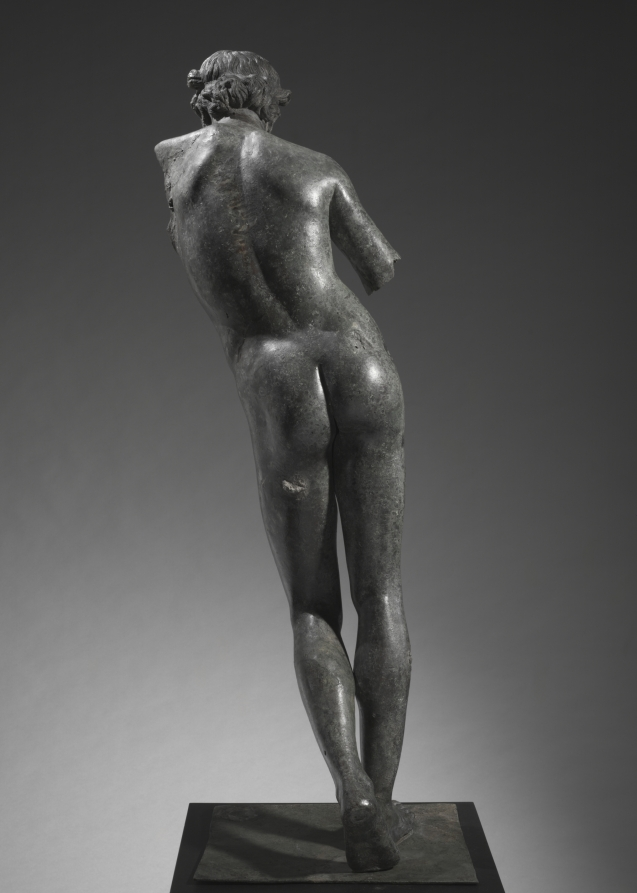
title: The Cleveland Apollo: Apollo Sauroktonos (Lizard-Slayer) or Apollo the Python-Slayer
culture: Greece, Athens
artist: attributed to Praxiteles (Greek, Athenian, c. 400–330 BCE)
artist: or Follower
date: c. 350–200 BCE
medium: bronze, copper, and stone inlay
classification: Sculpture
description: The Cleveland Apollo has been called both Lizard-Slayer (Sauroktonos) and Python-Slayer. The first name comes from the Roman author Pliny the Elder (23–79 CE), who noted in describing bronze works made by the Athenian sculptor Praxiteles (active around 370–330 BCE), “the youthful Apollo [is] known as the Sauroktonos because he is aiming an arrow at a lizard [Greek sauros] which is stealing toward him.” Scholars have long connected this description with artworks showing the young Greek god Apollo in a distinctive pose and hairstyle, standing on his right leg and leaning to his left. In more completely preserved versions, Apollo reaches toward a tree with his left arm and seems to take aim at a lizard. The Cleveland Apollo shows the adolescent god similarly posed and coiffed, making it an important addition to the Apollo Sauroktonos group—the only surviving large-scale bronze sculpture of the type. The young Greek god Apollo, identifiable by his distinctive hairstyle and pose, stands on his right leg and leans to his left, probably toward a now-lost tree. Although now separated, the left forearm and hand survive, together with an unusual lizard-like creature, perhaps drawn from the world of myth. A flat bronze base also remains, though it may be a later adaptation. A tree or other support has been lost, probably smaller than in the marble versions. Given its material and very high artistic quality—note the lifelike hair, fingernails, and inlaid copper lips and nipples—more than one scholar has suggested that the Cleveland Apollo could be the very sculpture seen by Pliny. Some have called the sculpture “Python-Slayer,” seeing the oddly shaped serpentine creature with asymmetrical legs as the mythical Python killed by Apollo in establishing his sanctuary at Delphi. But technical details may explain some of the asymmetry, and no other specific evidence connects it to Delphi. Most scholars would retain the name Sauroktonos (Lizard-Slayer) for the Cleveland Apollo, even as some debate whether it was made by Praxiteles himself or a later follower.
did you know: The Cleveland Apollo is the only surviving large-scale bronze sculpture of its type, Apollo Sauroktonos (the Lizard-Slayer).